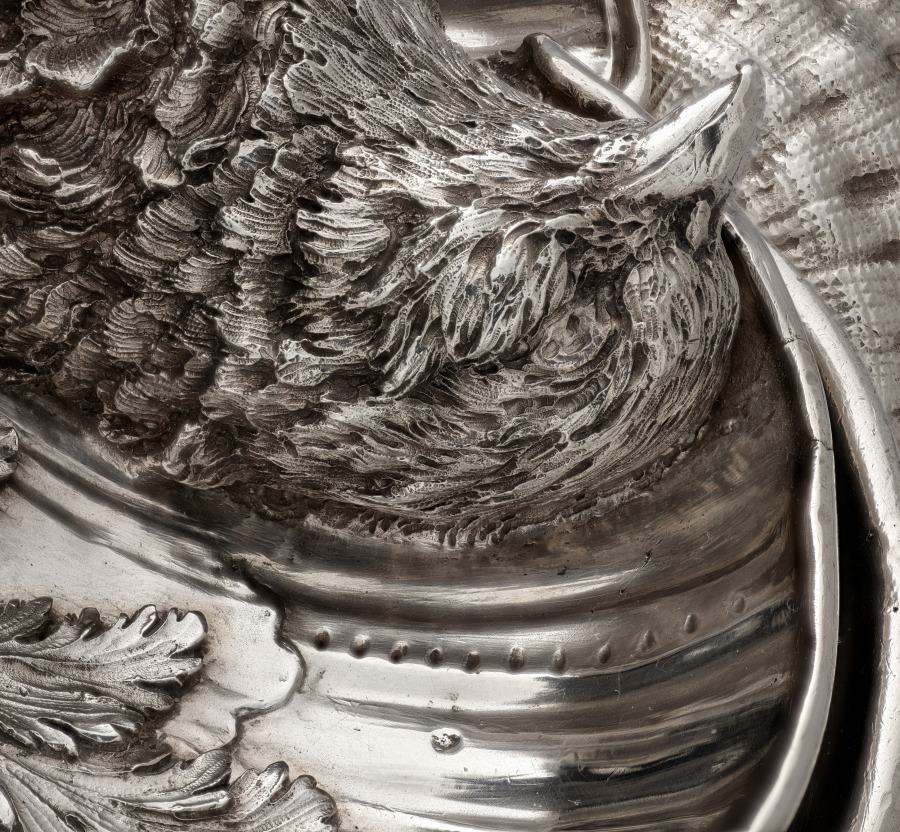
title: Cover for a Tureen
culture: France, Paris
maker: Henry Adnet (French, 1745)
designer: Juste-Aurèle Meissonnier (French, 1695–1750)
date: 1735–38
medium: silver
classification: Silver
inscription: engraved Meissonnier signature.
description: See entry for cover record 1977.182.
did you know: The langoustine, pigeon, and vegetables were cast using real examples giving the silver copies lifelike detail and appearance.